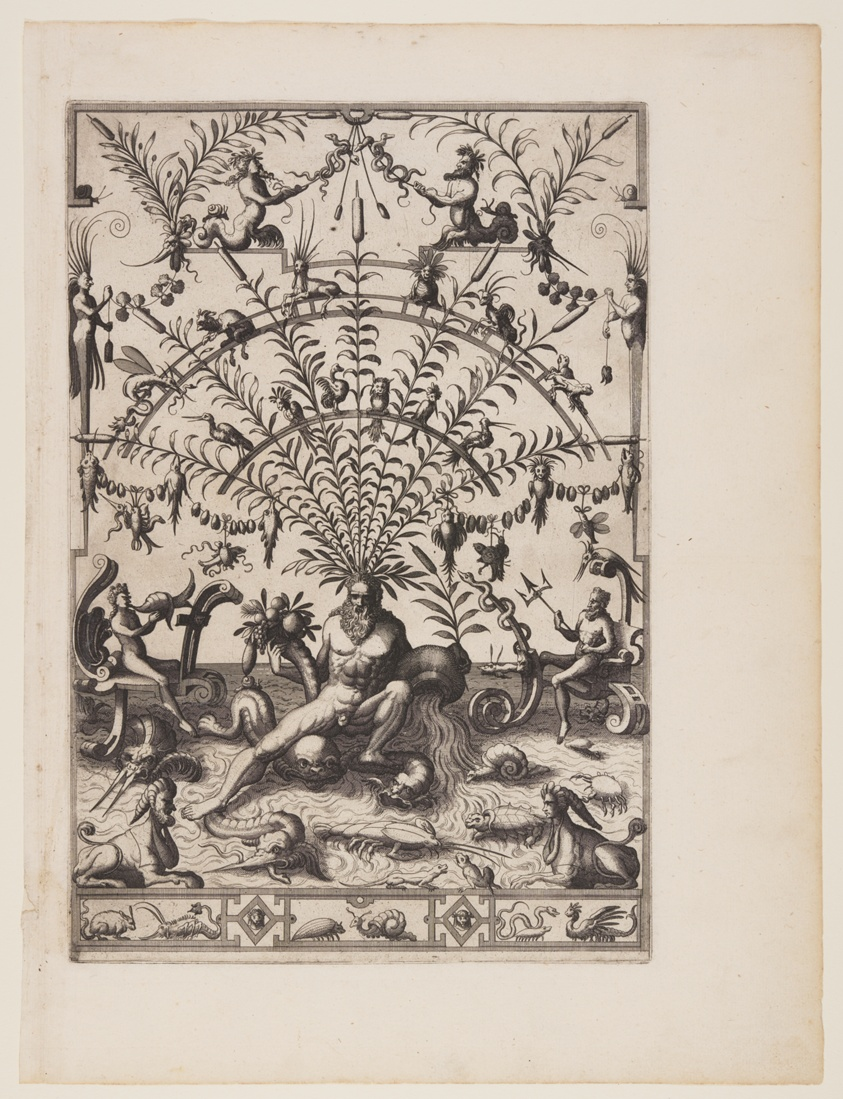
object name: Print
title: River God with Cornucopia and Stone Jar, from Veelderleij niewe inventien...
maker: Johannes van Doetecum (Netherlandish, 1528/32–1605) and Lucas van Doetecum (Dutch, died before 1584); after Cornelis Floris (Flemish, 1514-1575)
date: 1557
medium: Etching on ivory laid paper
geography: Netherlands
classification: print; paper; prints and drawing; etching